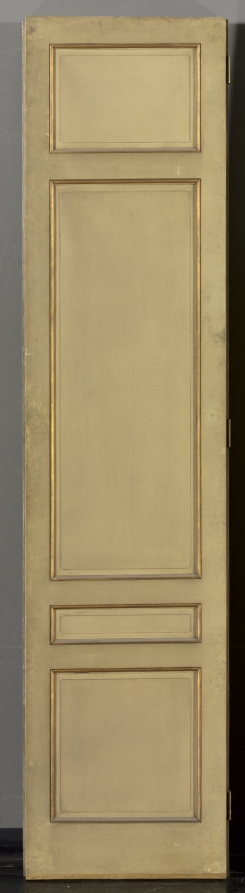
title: Double-leaf Doors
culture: France, 18th century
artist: Pierre Rousseau (French, 1751–1829)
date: 1790s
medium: oil on wood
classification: Painting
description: Shifts in style and taste often result in changes to original architectural details. Rousseau painted these doors with imitation dark wood grain. Another craftsman later scraped off the dark color surrounding the classical designs.